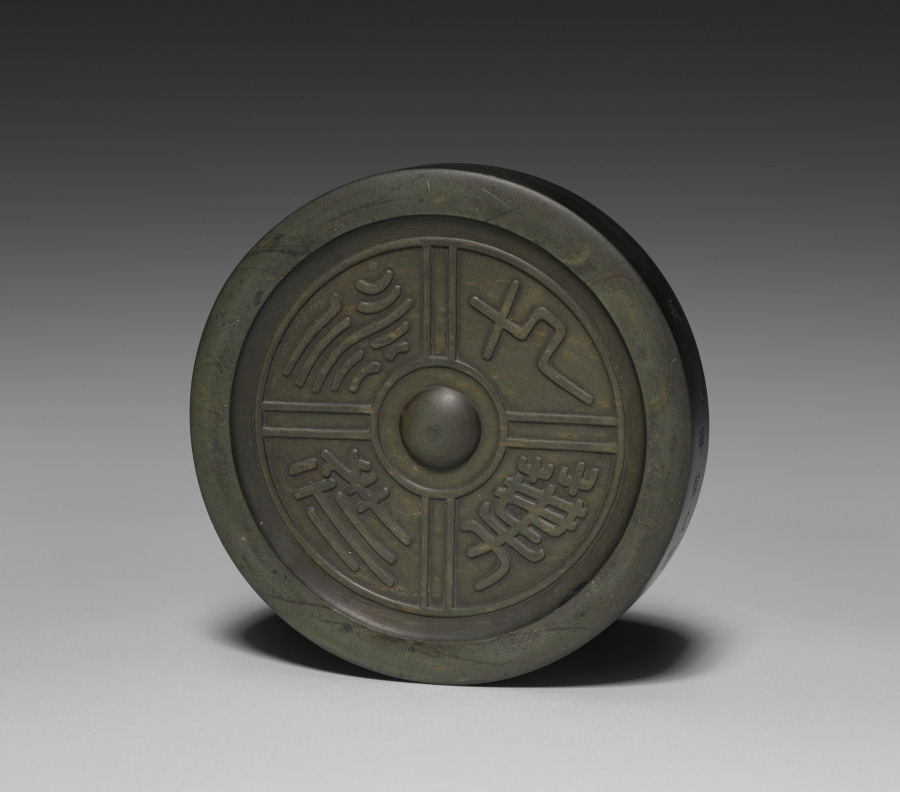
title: Inkstone in the Shape of a Roof Tile with Seal Script Characters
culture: China, Qing dynasty (1644–1911)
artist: Workshop of Jian Guzhai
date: 1700s–1800s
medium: She stone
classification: Stone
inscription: 七葉永祥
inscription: 「鑑古齋仿製」 「穎川春暉館文寶」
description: This inkstone is particularly noteworthy for its inscriptions in two styles. The base shows four characters in seal script (zhuanshu) expressing auspicious, or favorable wishes, while the characters on the side in standard script (kaishu) record the name of the workshop and that of the collector’s studio. Inkstones were used to grind solid ink cakes with the addition of water to produce liquid ink for brush painting and calligraphy.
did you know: The four large seal script characters on the base of this inkstone, 七葉永祥, may be read as "eternal good fortune for seven generations."